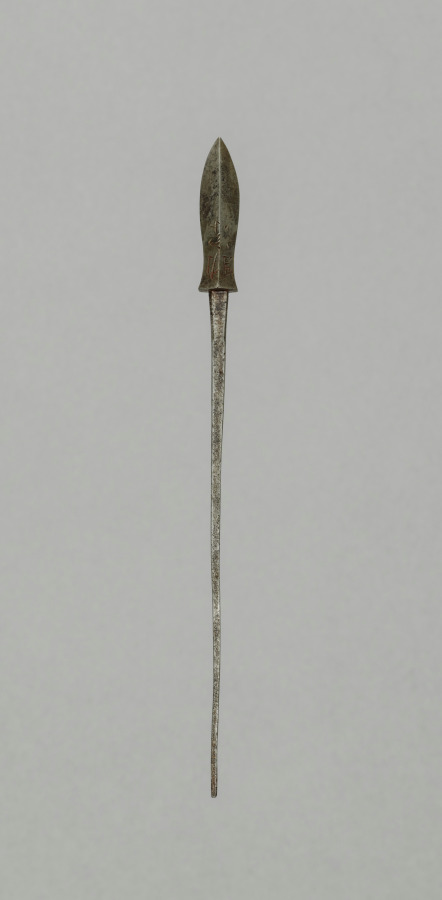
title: Arrow Point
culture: Japan, Edo period (1615–1868)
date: 1700s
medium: steel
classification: Arms and Armor